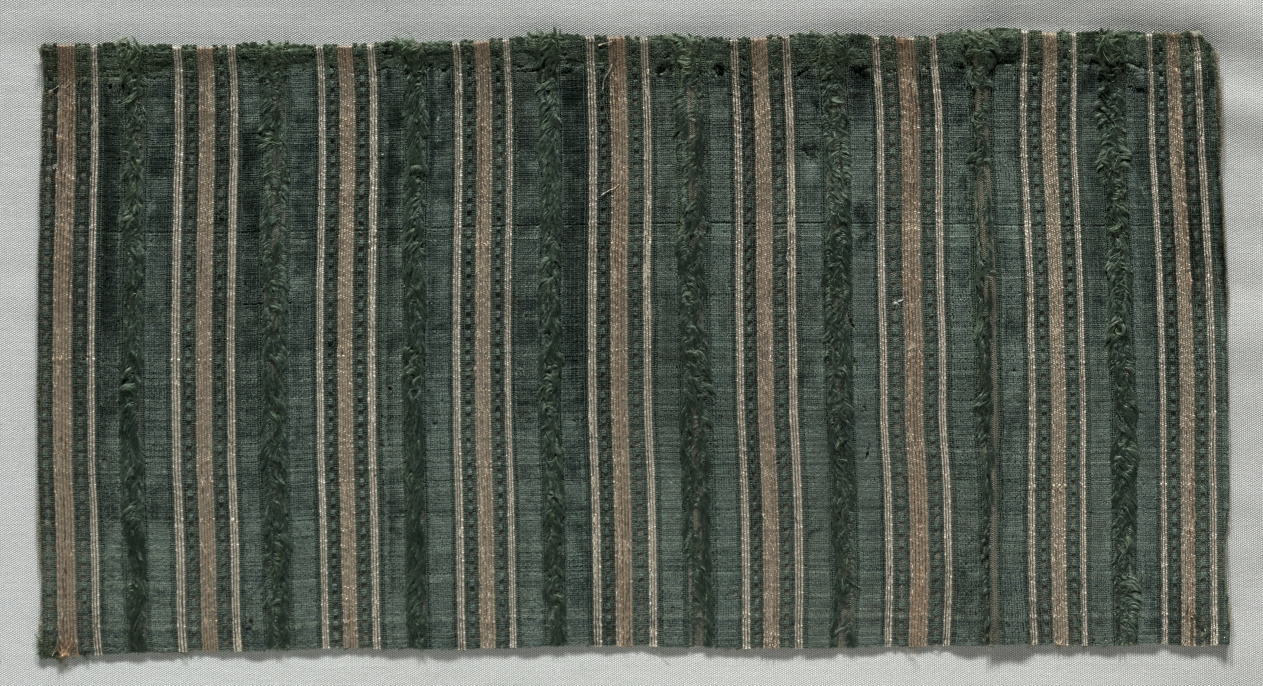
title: Velvet Fragment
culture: Italy, 18th century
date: 1700s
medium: velvet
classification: Velvet